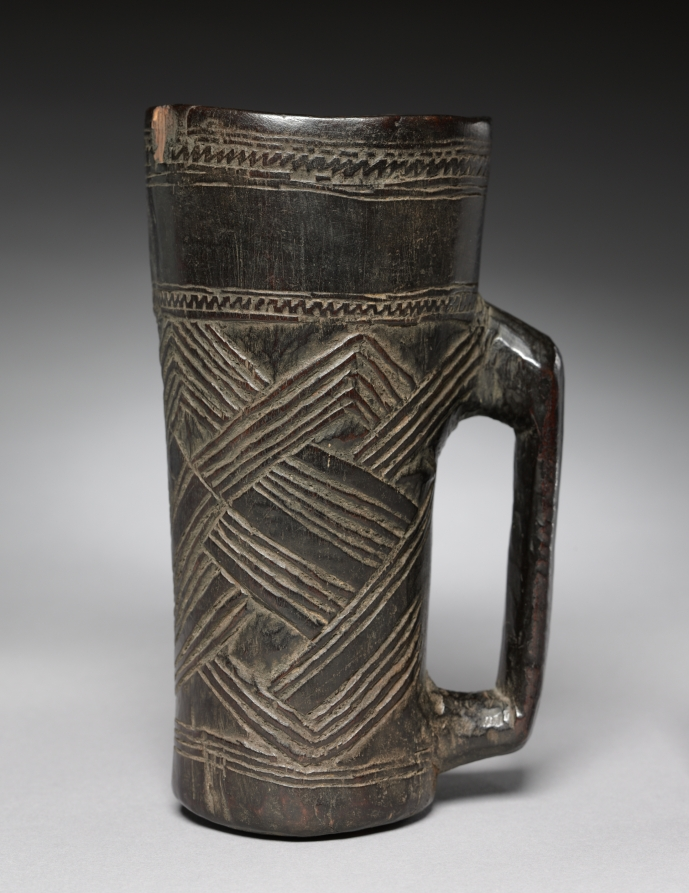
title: Cup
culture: Central Africa, Democratic Republic of the Congo, Bushoongo, 20th century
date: 1900s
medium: Wood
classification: Vessels